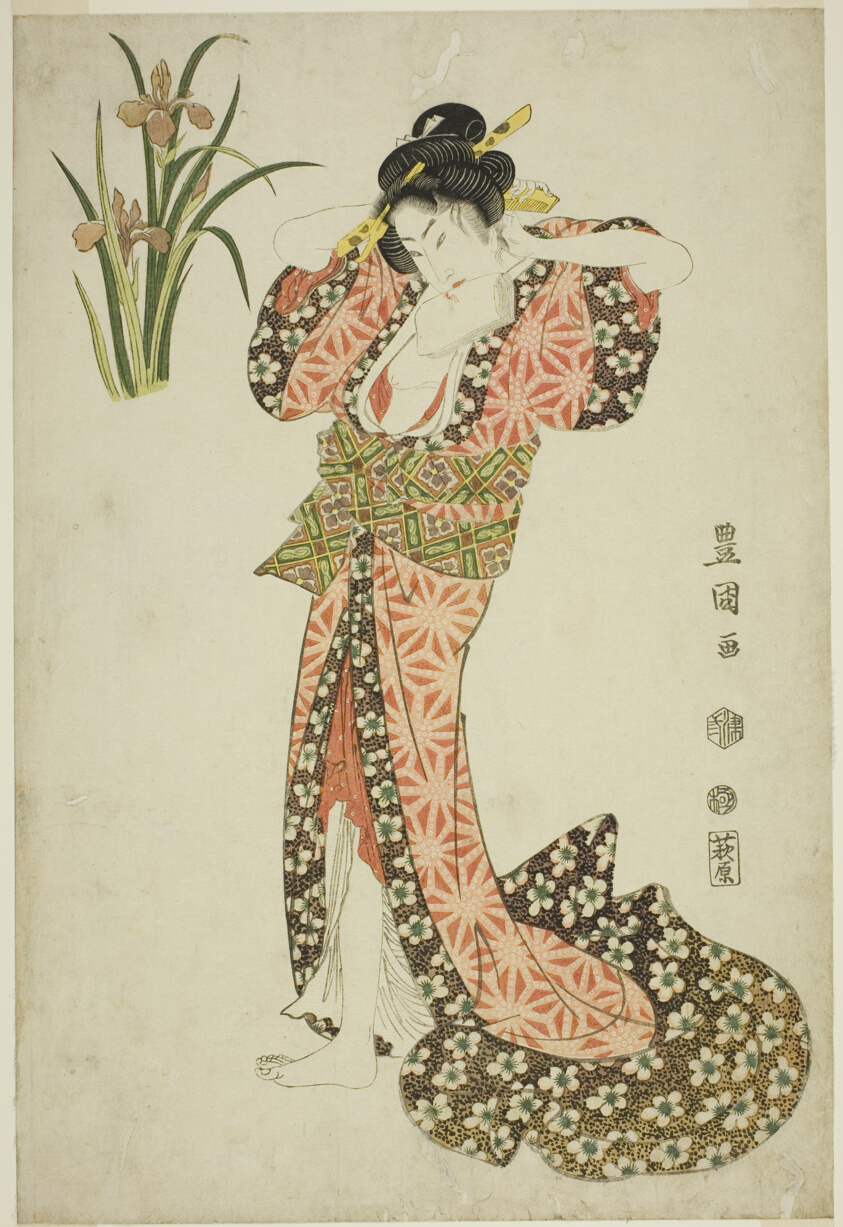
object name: Print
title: Irises: beauty arranging hair, from an untitled series of beauties and flowers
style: Japanese (culture or style)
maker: Utagawa Toyokuni I 初代 歌川 豊国; Japanese, 1769–1825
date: 1812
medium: Color woodblock print; oban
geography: Japan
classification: woodblock print; print; asian art